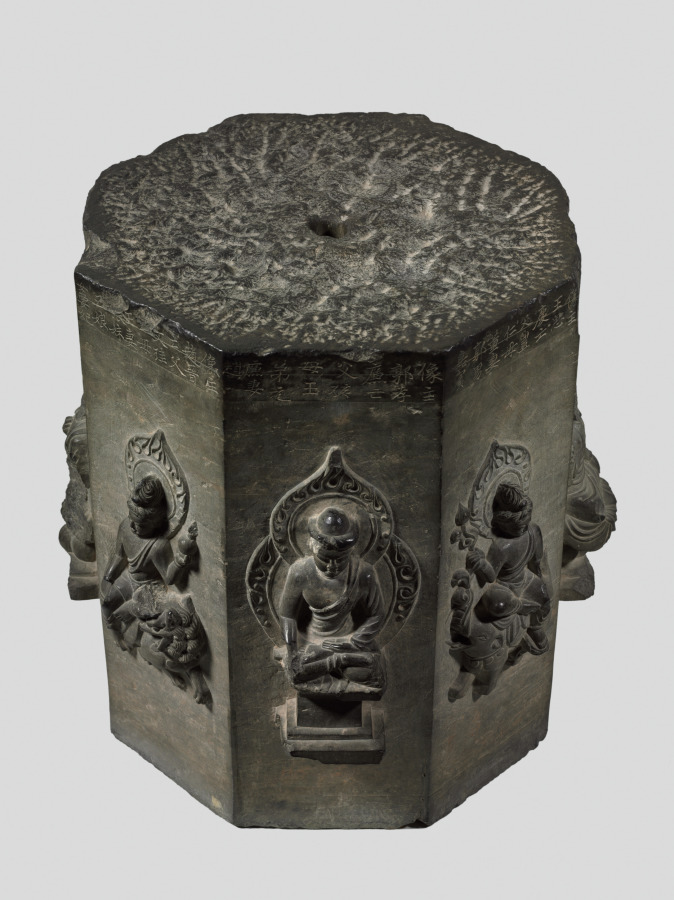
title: Section of a Dharani Pillar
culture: China, Tang dynasty (618-907)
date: 618–907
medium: limestone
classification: Sculpture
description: This octagonal stone pillar, with Buddhist figures carved on its eight sides, is part of a dharani pillar commissioned by Buddhist believers to pay tribute to the dead. The eight inscriptions seen here are eulogies dedicated by eight families to their deceased family members. Dharanis were a form of spell in Esoteric Buddhism said to possess supernatural power when being recited or carried and were incorporated into sutras, such as the Buddha Usnisa Vijaya Dharani Sutra. Dharani pillars, also called sutra pillars, became the dominant bearers of Usnisa Vijaya Dharani which supposedly helped sentient beings prolong life and destroy hardships of the eternal cycle of life and the realms of hell.